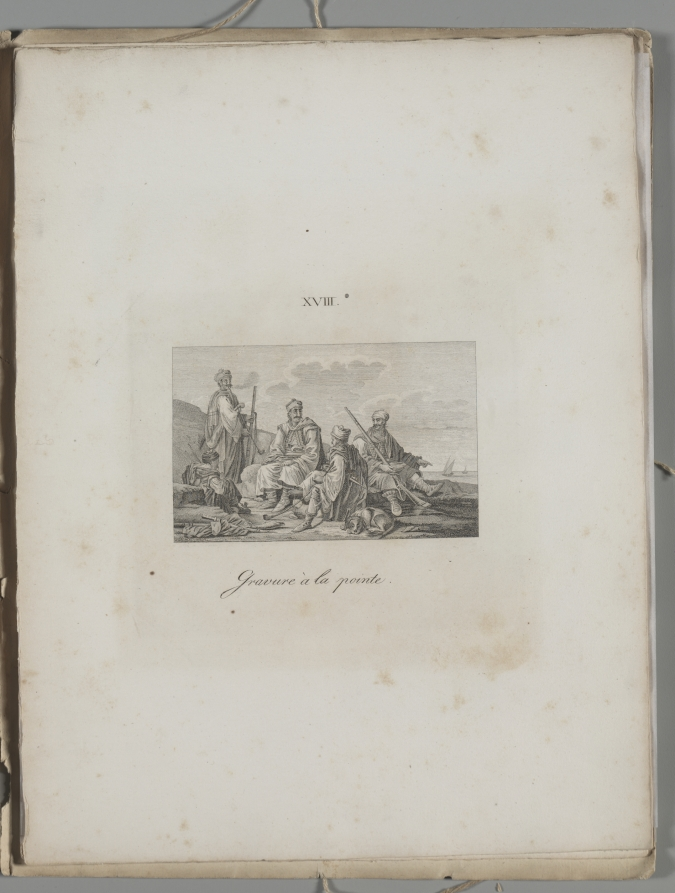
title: Art of the Lithograph: Albanian, Plate XVIII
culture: Germany, 19th century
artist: Alois Senefelder (German, 1771–1834)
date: 1819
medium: lithograph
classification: Portfolio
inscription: On plate: lower center: XVIII; upper center: Gravure à la pointe